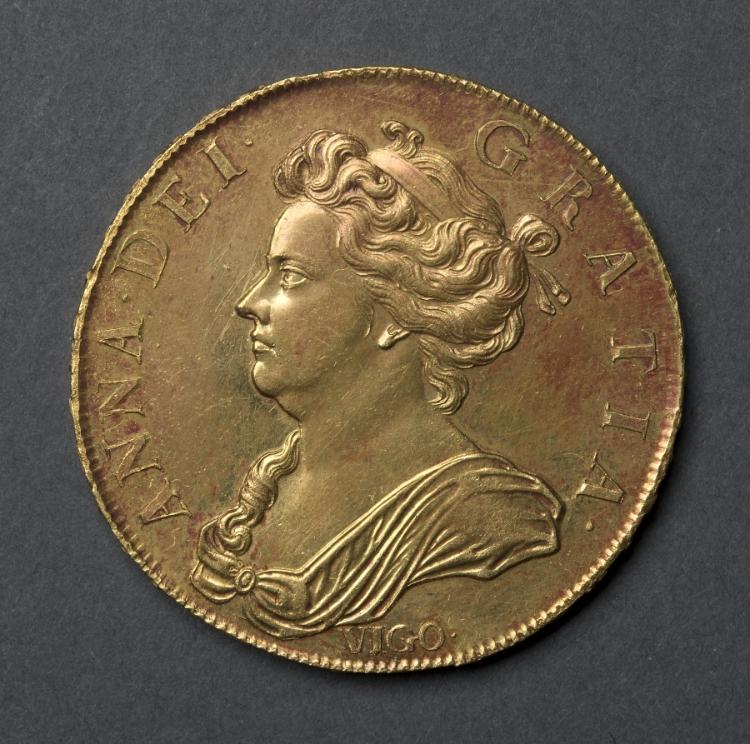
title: Five Guineas: Anne (obverse)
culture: England, Anne, 1702-1714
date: 1703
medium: gold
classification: Coins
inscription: ANNA . DEI . GRATIA; below: VIGO.